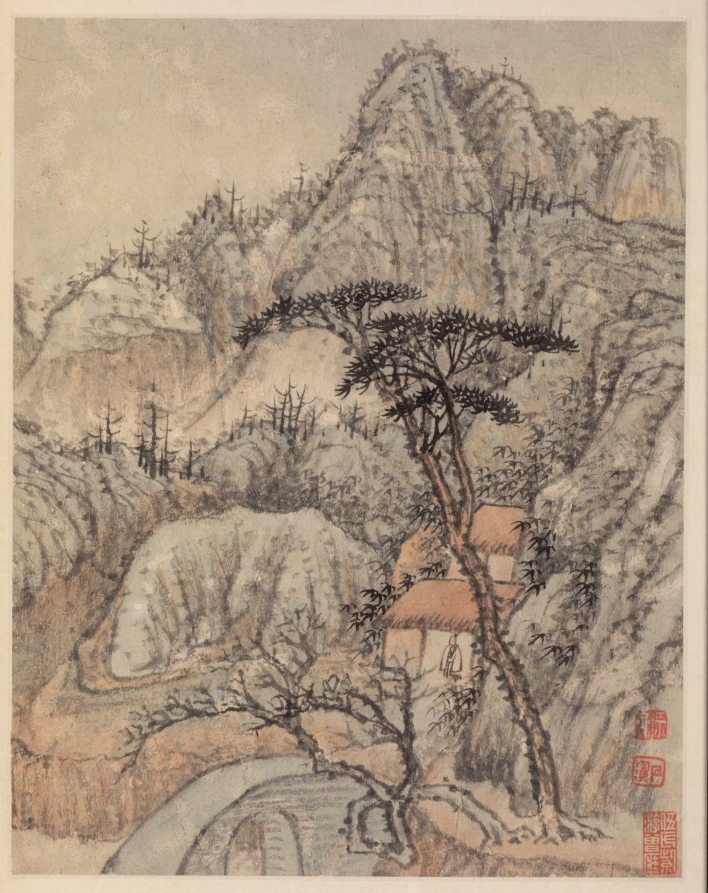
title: Reminiscences of Qinhuai River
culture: China, Qing dynasty (1644-1911)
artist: Shitao (Chinese, 1642–1707)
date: 1642–1707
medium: album leaf, ink and color on Song paper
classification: Painting